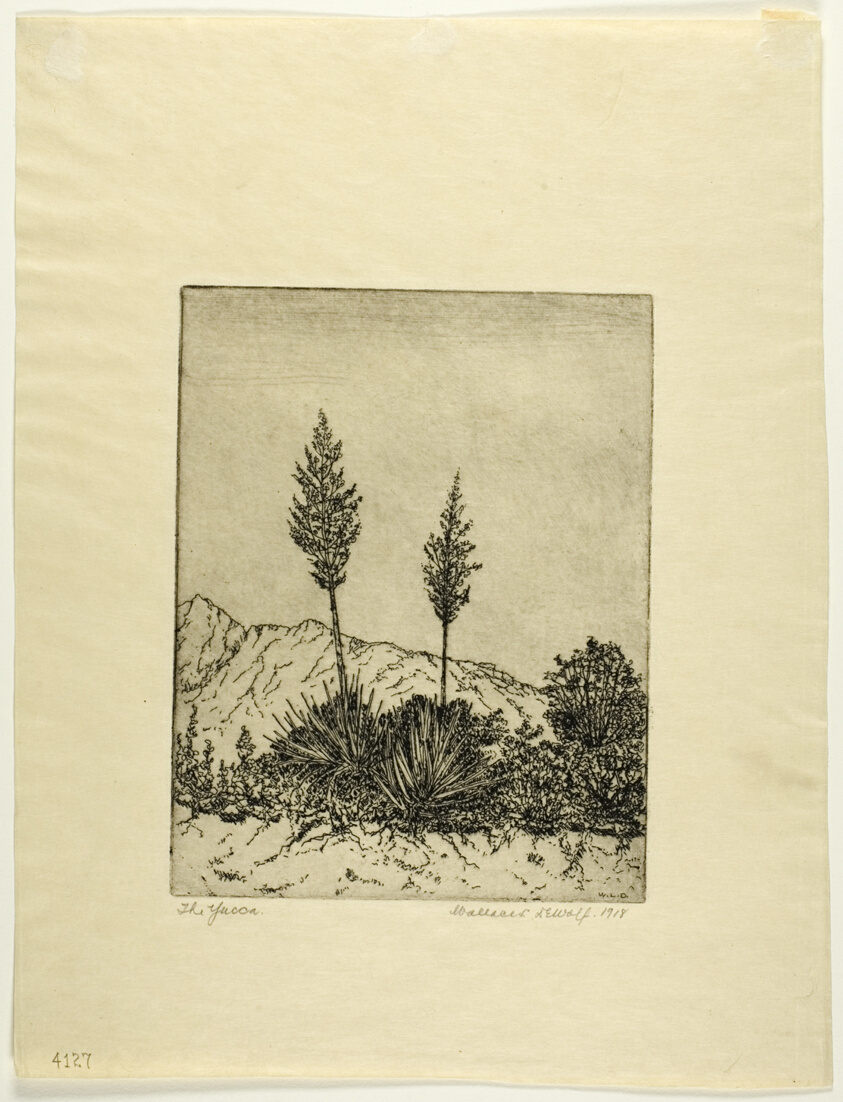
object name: Print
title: The Yucca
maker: Wallace L. DeWolf (American, 1854-1930)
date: 1918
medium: Etching on cream wove paper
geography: United States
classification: etching; print; prints and drawing